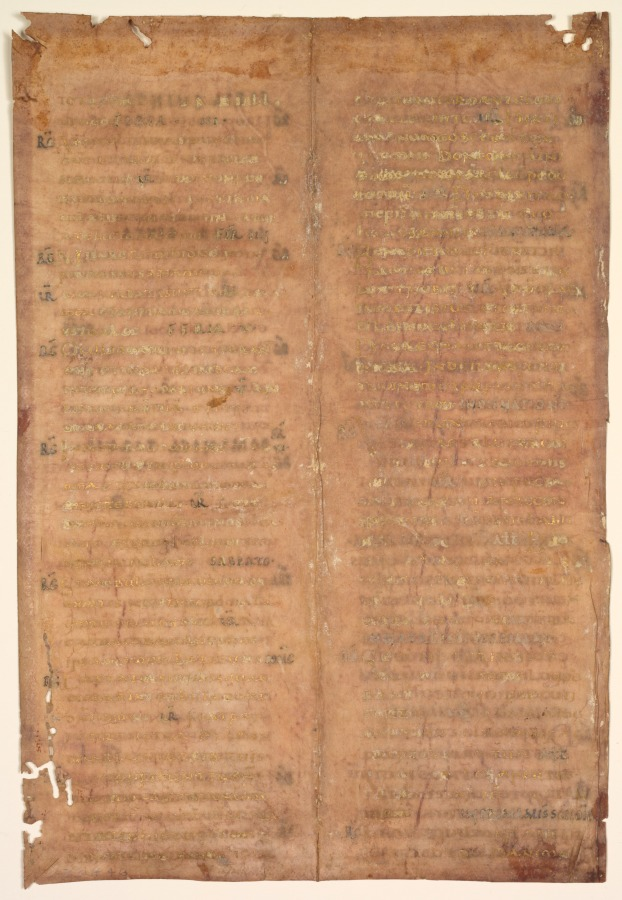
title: Bifolium Excised from a Carolingian Gradual (verso)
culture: Germany or Northeastern France, 9th century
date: c. 830–860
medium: gold and silver ink on purple parchment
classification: Manuscript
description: This rare leaf comes from a cantatorium or gradual, a book containing the chants to be sung during the Mass. Other leaves from the same book survive in Berlin and Trier. A bifolium, or double-leaf, it does not contain decorated letters but rather "emphasized" letters. These were enlarged and pushed out into the margins to call attention to the eye. Such emphasized letters originated in late classical times and were the precursor to the decorated initial developed by medieval scribes. The purple-stained vellum (now faded to a deep pink) with its text written in gold and silver inks (now turned black) suggested great luxury with its sumptuous appearance. In Mediterranean regions, the purple dye was obtained from murex, a shell-fish dye. In northern Europe, plant dyes were used as an alternative. Combined with the use of gold and silver ink (now turned black) a spectacular appearance was achieved that is traceable back to classical antiquity.